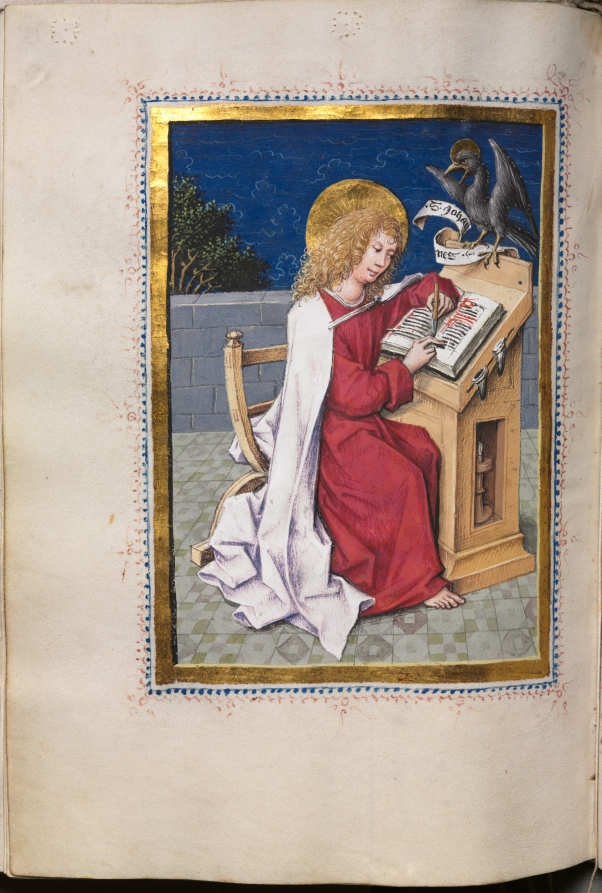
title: Gospel Book with Evangelist Portraits: Saint John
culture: Germany, Middle Rhine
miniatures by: Master of the House-Book (German, c. 1470–1500)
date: c. 1480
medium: ink, tempera, and gold on vellum; original blind stamped leather binding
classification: Bound Volume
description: Each of the four gospels, here in Latin, are preceded by a full-page miniature of the appropriate Evangelist. As is conventional, the Evangelists are represented as contemporary scribes seated at a lectern surrounded by all the accouterments of the trade---inkpots, quill pens, penknives, etc. The miniatures' style is characteristically German late Gothic in its expressive use of angular drapery and realistic detail. Each miniature, however, bears the marks of The Hausbuch Master's hand: notice the terrace space for each figure and the emphasis on realistically rendered details, such as the furniture construction and the tools of the scribe as well as the facial types, with their heavy-lidded, downcast eyes. This artist was occasionally noted for his humor, as here in the portrait of the Evangelist John in which he depicted the saint erasing an error in his text with a pen knife in his left hand and a quill pen in his right. The skillful penwork, tracery, vine scrolls, and the large initials are the work of the other artists. The binding is original. The Hausbuch Master is known primarily for an album of lively drawings as well as some ninety copper engravings. He was also a panel painter of some distinction.